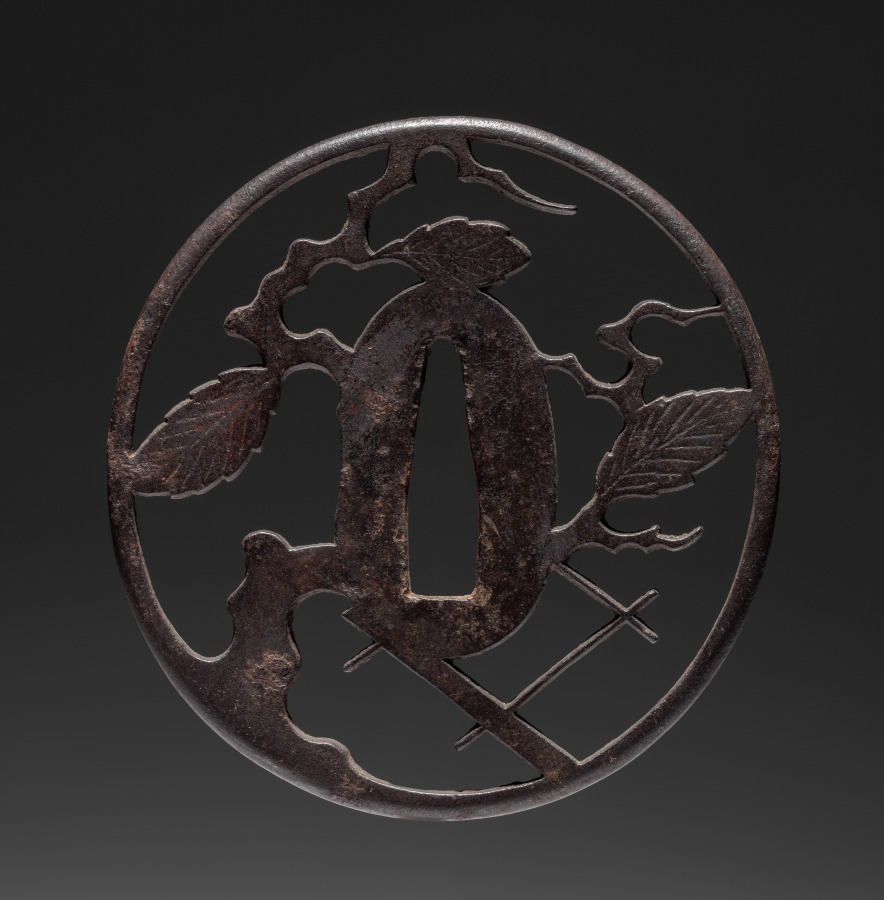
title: Sword Guard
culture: Japan, Edo period (1615–1868)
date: 1615–1868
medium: iron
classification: Arms and Armor